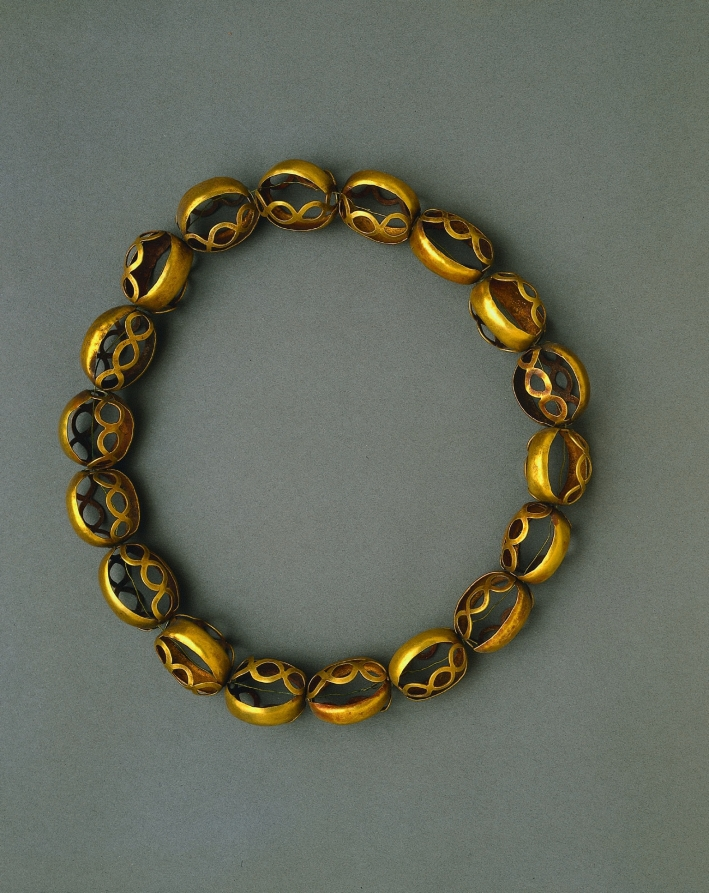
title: Necklace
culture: Peru, North Highlands, Chavín de Huantar(?), Chavín style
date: c. 500–200 BCE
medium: hammered and cut gold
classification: Metalwork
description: There seems to be a link between Chavín religion and appearance of the Andes’ first large precious-metal objects, made using revolutionary new metallurgical processes. Chavín may have developed these technical innovations to express the inexpressible, the "wholly other" nature of its religion. In many areas, elite men and women wore the ornaments as emblems of their ties to this religion, and eventually were buried with them. These 16 objects, along with three others not in the museum’s collection, are said to have come as a group from Chavín itself.